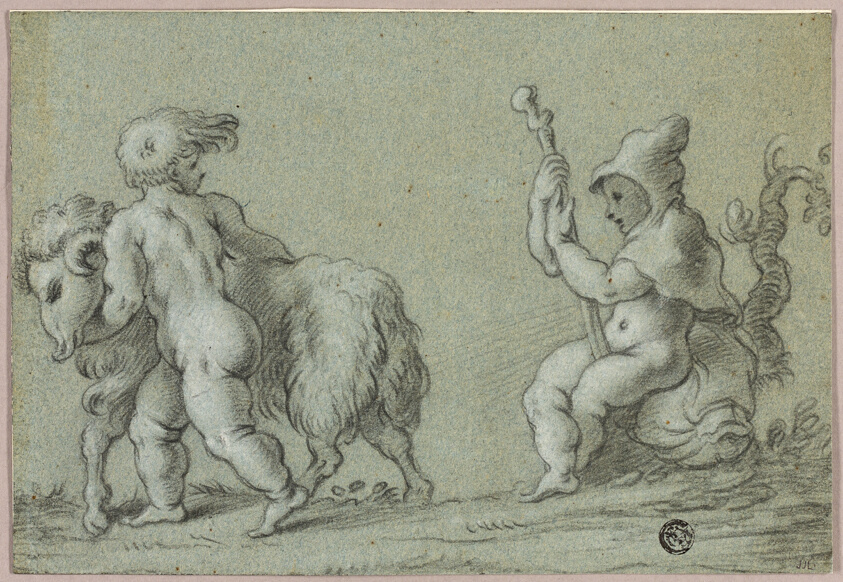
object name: Drawing and Watercolor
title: Putti as Goatherds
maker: Unknown artist; possibly Flemish, 18th century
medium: Black and white chalk on blue laid paper, laid down on ivory laid paper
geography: Flanders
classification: chalk; drawings (visual works); prints and drawing